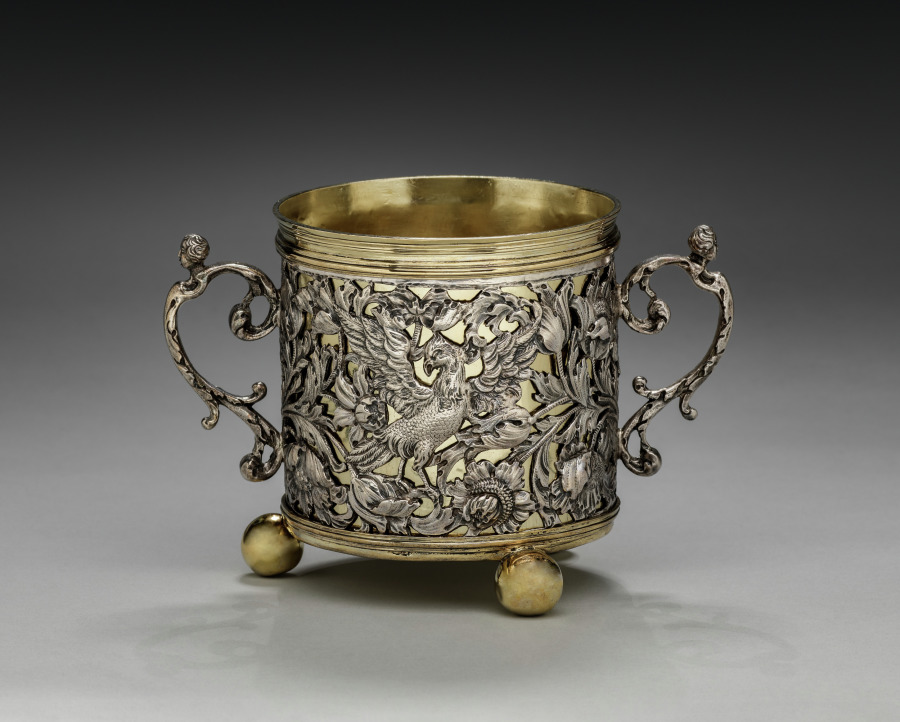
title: Two-Handled Cup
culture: England, London, 17th century (Charles II)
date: 1677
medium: silver and silver gilt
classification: Silver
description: Due to its size and ornament, this vessel may have functioned as a caudle-cup, containing a mixture of ale or wine and bread, oatmeal, eggs, sugar, and spices that was given to women after childbirth to help them regain their strength. The scrolling foliage and exotic birds along the exterior of this cup were likely based on prints circulating in the 1600s. The reclining female figures capping the handles and the acanthus bud finial on the accompanying lid recall common architectural motifs.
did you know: This two-handled cup is accompanied by a lid. See cover record.